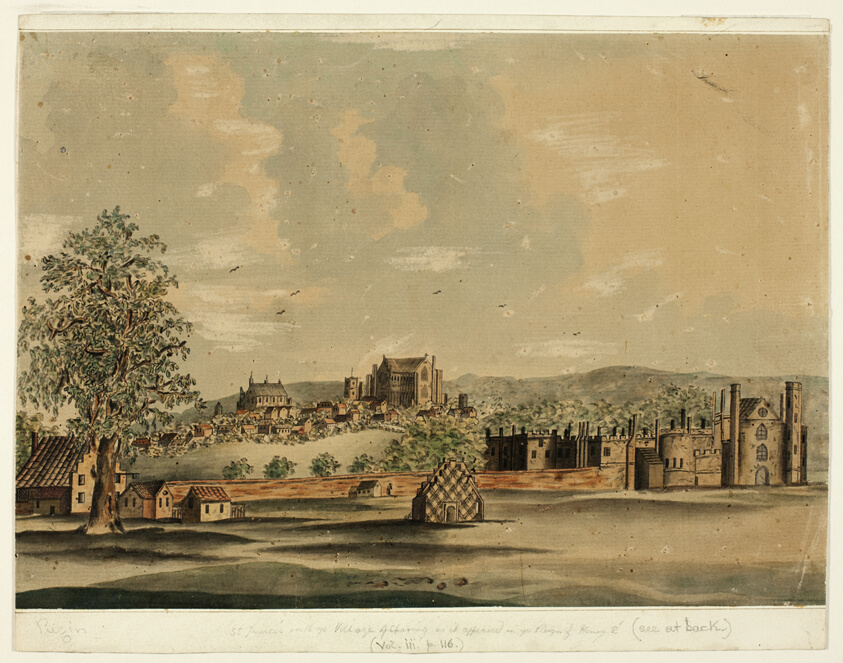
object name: Drawing and Watercolor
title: St. James's with the Village of Charing as It Appeared in ye Reign of Henry VIII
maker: Attributed to Augustus Charles Pugin; English, born France, 1762-1832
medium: Brush and watercolor, on tan laid paper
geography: England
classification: watercolor; drawings (visual works); prints and drawing